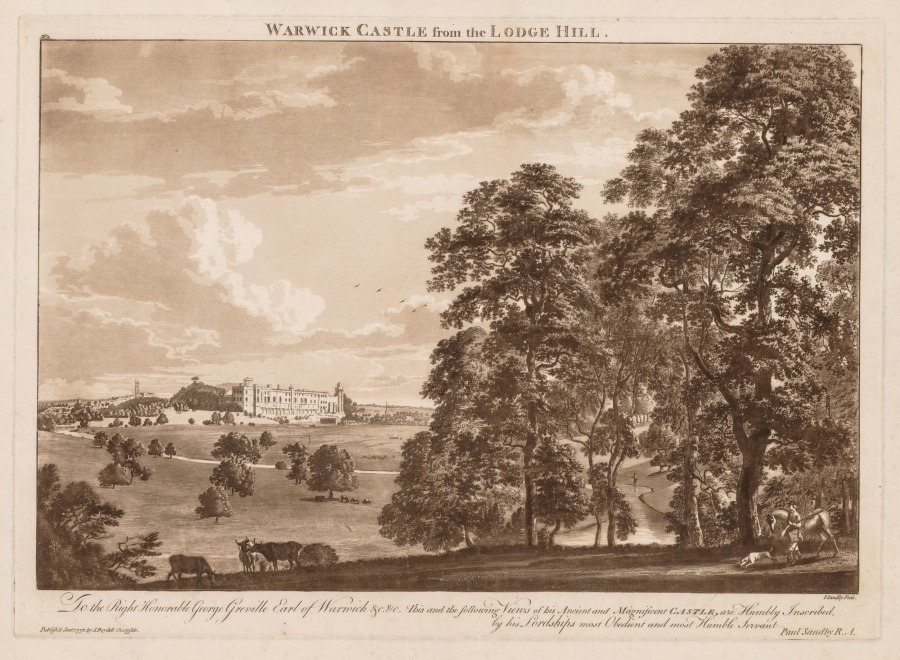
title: Views of Warwick Castle: Warwick Castle from the Lodge Hill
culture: England, 18th century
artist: Paul Sandby (British, 1731–1809)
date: 1776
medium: etching and aquatint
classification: Print